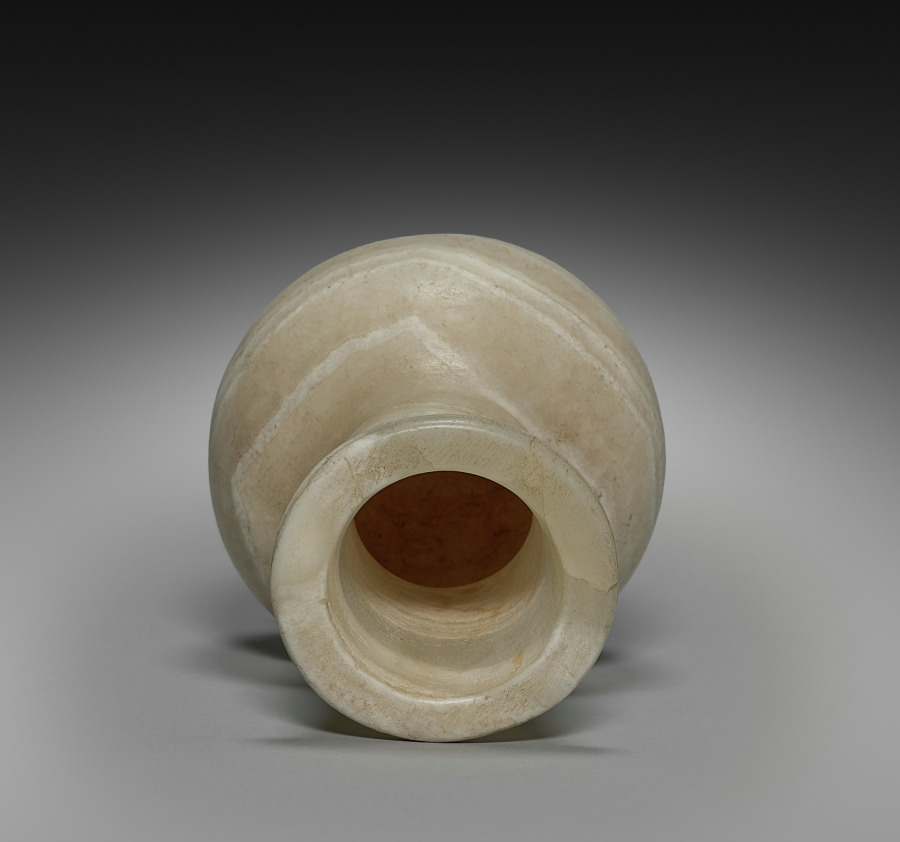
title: Long-Necked Flask with Lid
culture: Egypt, New Kingdom (1540–1069 BCE), Dynasty 18, reign of Tuthmosis III (1479–1425 BCE)–reign of Amenhotep III (1390–1352 BCE)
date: 1401–1353 BCE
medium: travertine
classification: Vessels